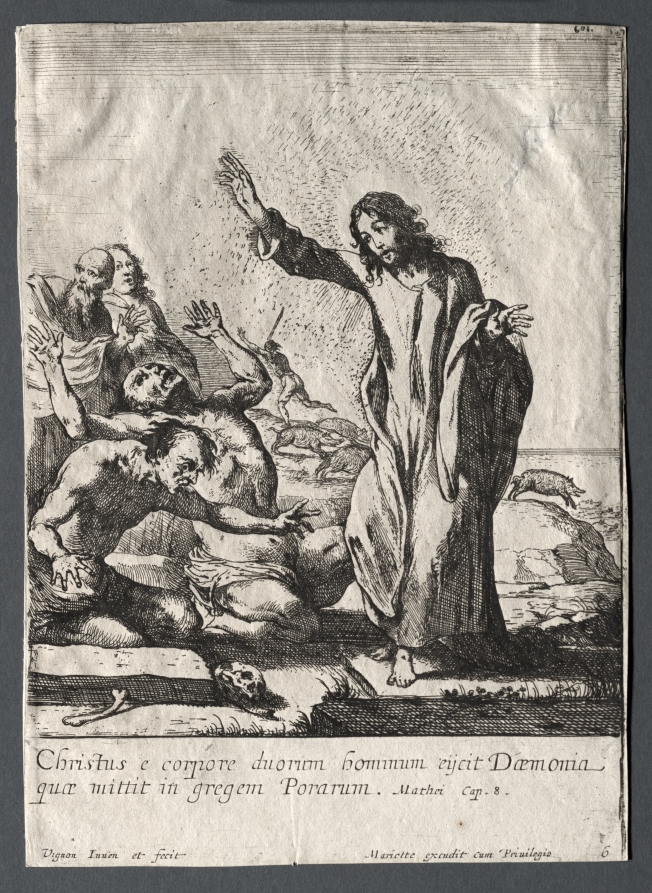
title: The Miracles of Jesus Christ: Christ Delivering the Possessed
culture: France, 17th century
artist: Claude Vignon (French, 1593–1670)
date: c. 1638–43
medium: etching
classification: Print